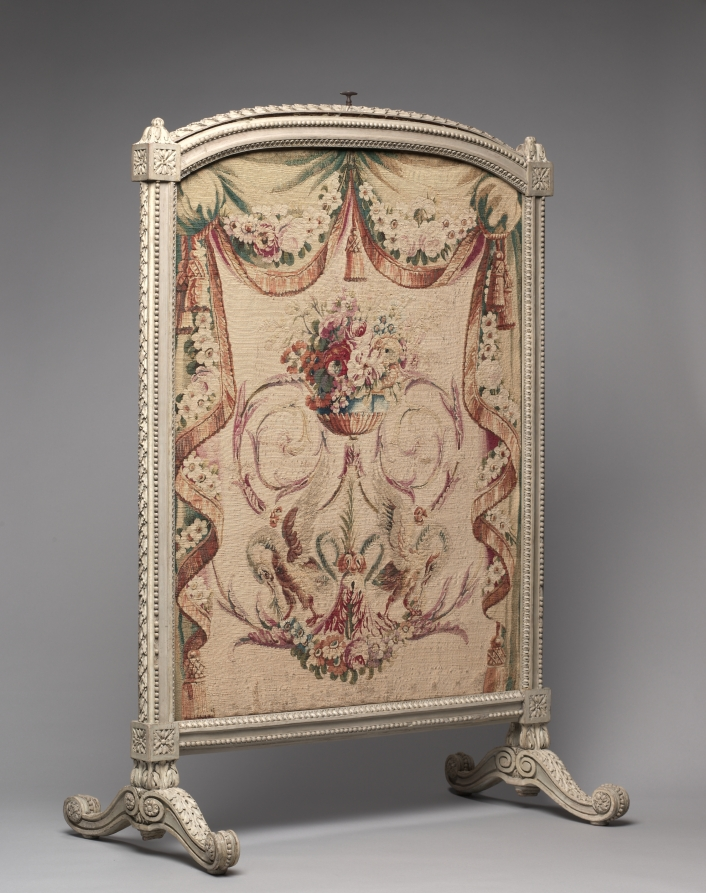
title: Fire Screen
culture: France, Paris, style of Louis XVI, 18th century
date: c. 1785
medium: carved and painted wood with tapestry panel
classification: Furniture and woodwork